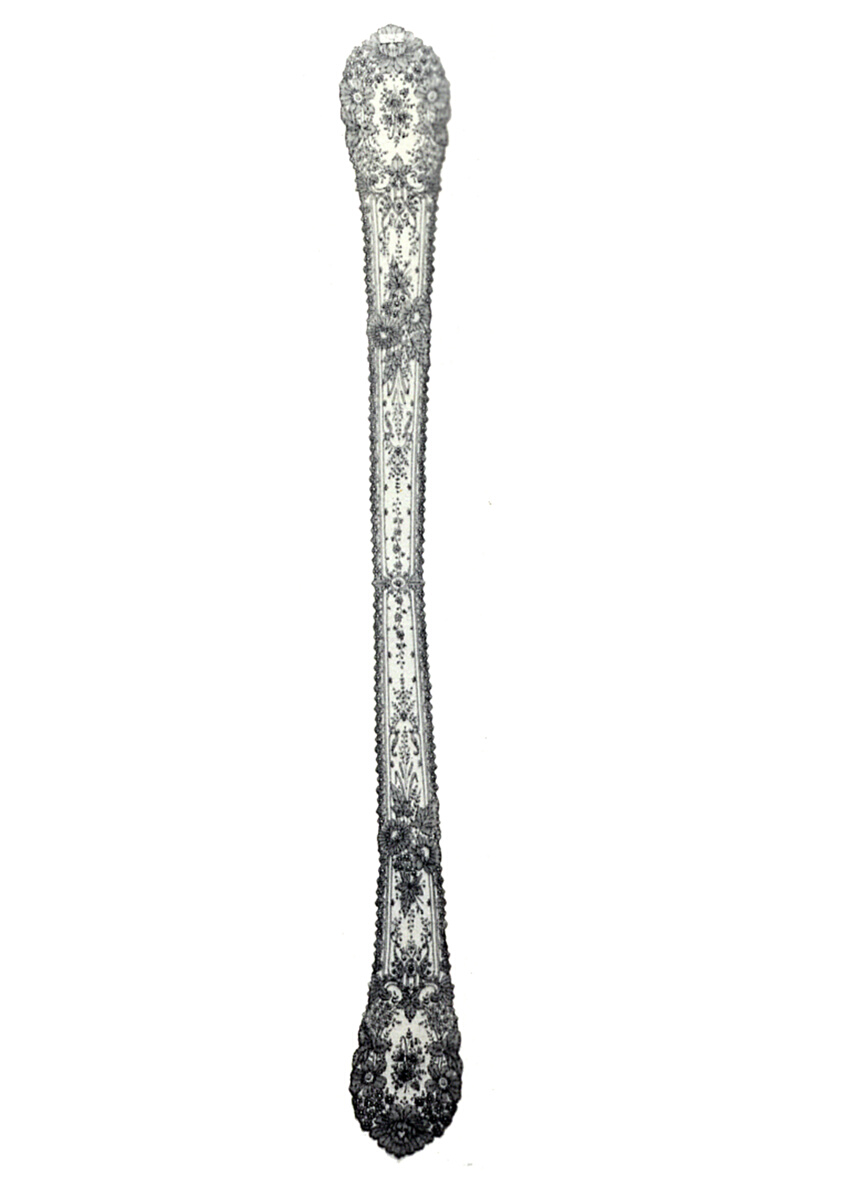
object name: Costume and Accessories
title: Pair of Lappets (Joined)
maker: France, Bayeux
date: 1850s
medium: Silk, bobbin straight lace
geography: Bayeux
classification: costume accessory; lace - bobbin; textile; costume; costume accessory - headdress; costume accessory worn above the waist